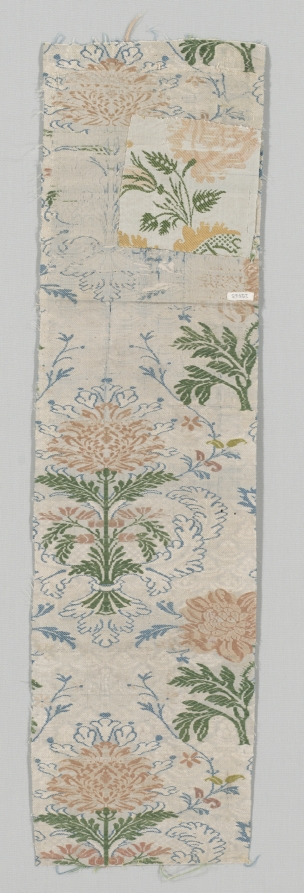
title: Fragment (Mounted with 1919.544b)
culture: Italy, 17th century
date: 1600s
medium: brocade, silk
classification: Textile